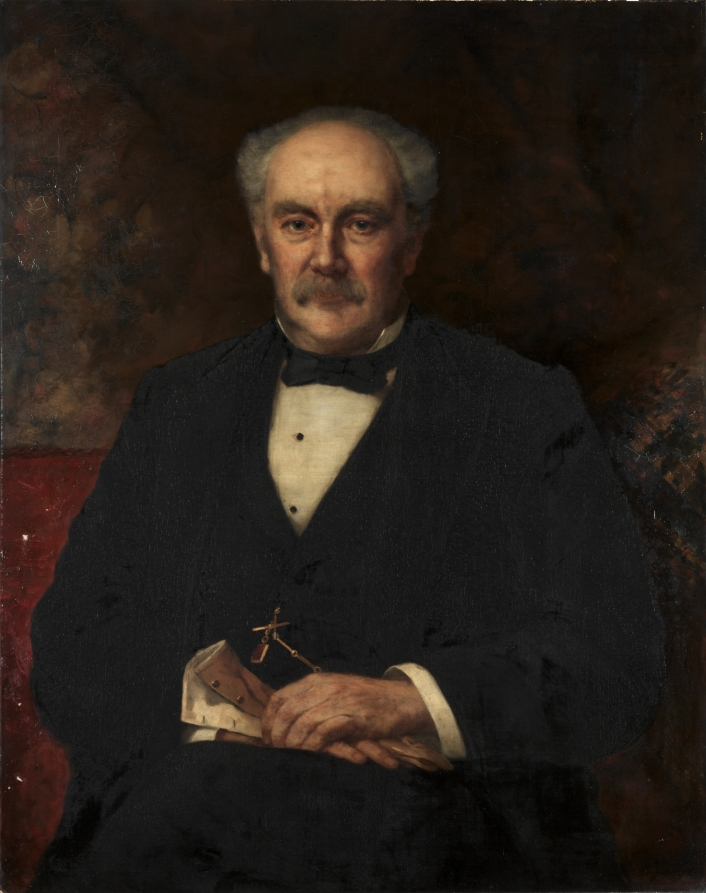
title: Hinman B. Hurlbut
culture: America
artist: John Harrison Witt (American, 1840–1901)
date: 1870s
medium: oil on canvas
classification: Painting